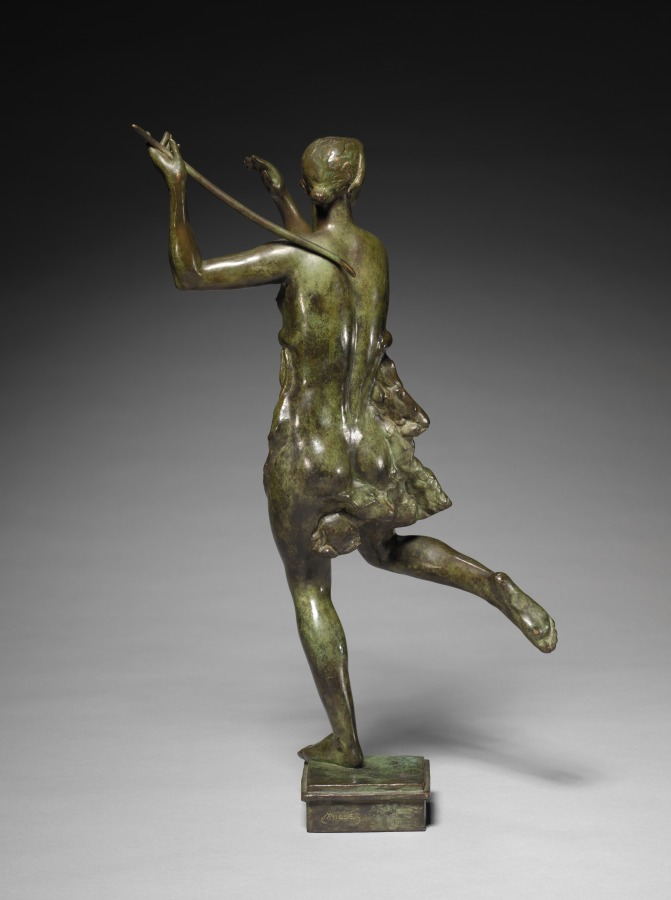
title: Diana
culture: Sweden, 20th century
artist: Carl Milles (Swedish, 1875–1955)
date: 1927–1928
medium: bronze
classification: Sculpture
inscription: Signed on back of base: "Milles"